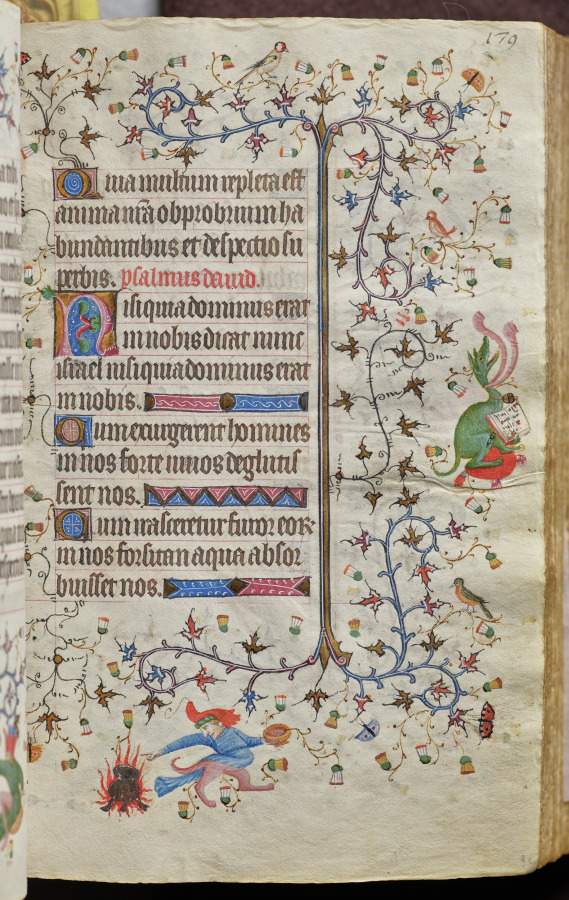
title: Hours of Charles the Noble, King of Navarre (1361-1425): fol. 90r, Text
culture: France, Paris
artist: Master of the Brussels Initials and Associates (French)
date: c. 1405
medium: ink, tempera, and gold on vellum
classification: Bound Volume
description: This precious volume was obviously highly prized by its owner, the French-born King of Navarre, who had his coat of arms painted on no less than twenty folios. Rather than directly commissioning this manuscript from a specific workshop, it seems that Charles the Noble acquired his book of hours -- perhaps ready-made for the luxury market -- while on a trip to Paris in 1404-05. A collaborative effort, six painting styles are evidenced within the pages of this codex, those of two Italians, two Frenchmen, and two Netherlanders. The painter who was responsible for the planning and decoration of the book, and who produced seventeen of the large miniatures, was a Bolognese artist known as the Master of the Brussels Initials. His principal assistant, responsible for most of the borders, was a Florentine who signed his name "Zecho" da Firenze on folio 208 verso.